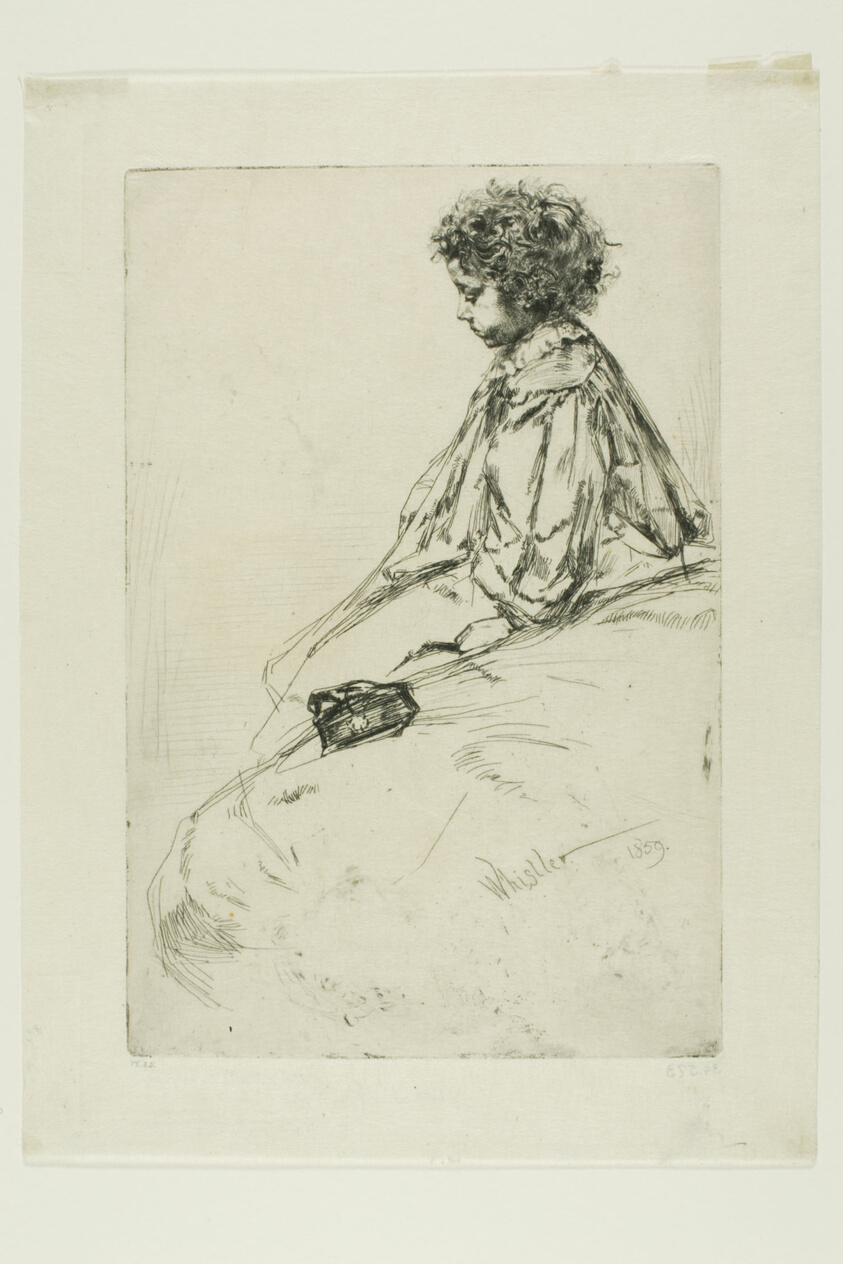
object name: Print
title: Bibi Lalouette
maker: James McNeill Whistler (American, 1834-1903)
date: 1859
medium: Etching and drypoint with foul biting in black ink on cream Japanese paper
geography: United States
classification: etching; foul biting; drypoint; print; prints and drawing; paper